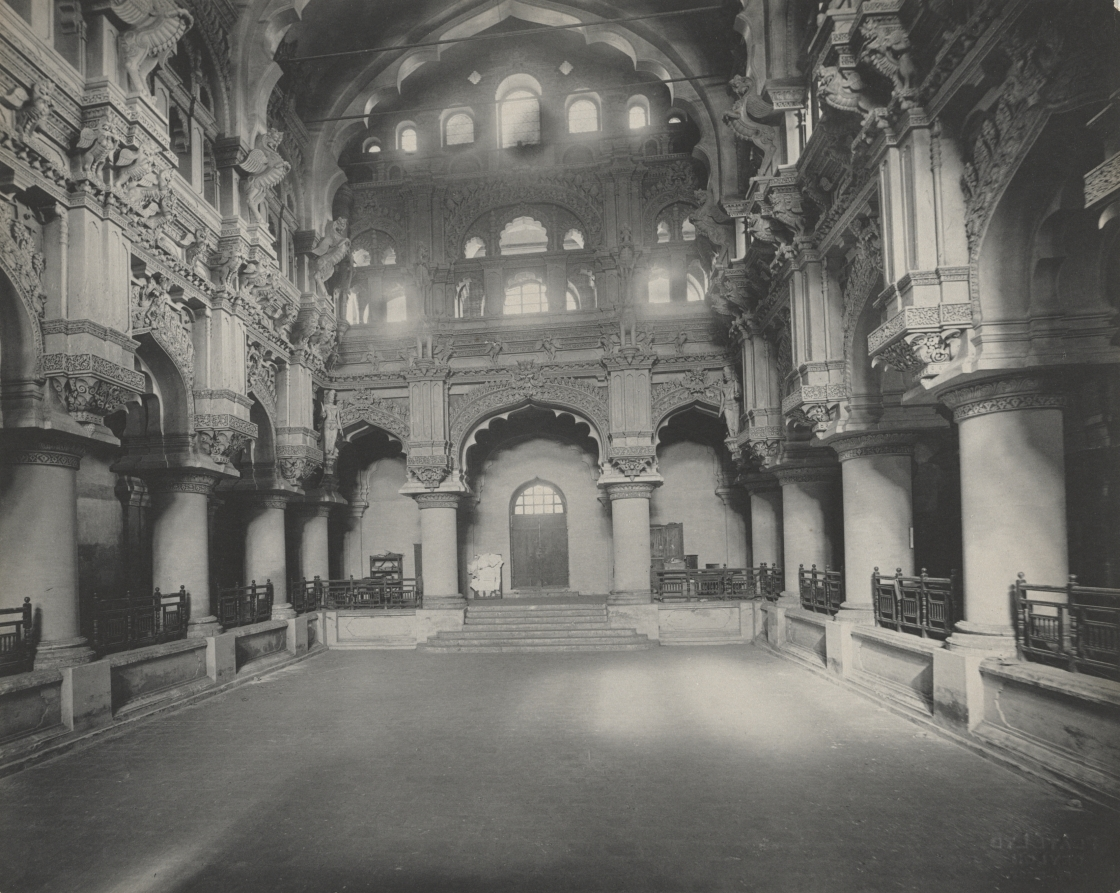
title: Entrance to Torumal Paiks Palace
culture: Ceylon, now Sri Lanka, 19th century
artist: A. W. A. Plâté Studio (Ceylonese)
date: c. 1890s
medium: platinum print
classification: Photograph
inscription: written in pencil on verso: "950 Thadura Entrance to Torumal Paiks Palace 950/6"